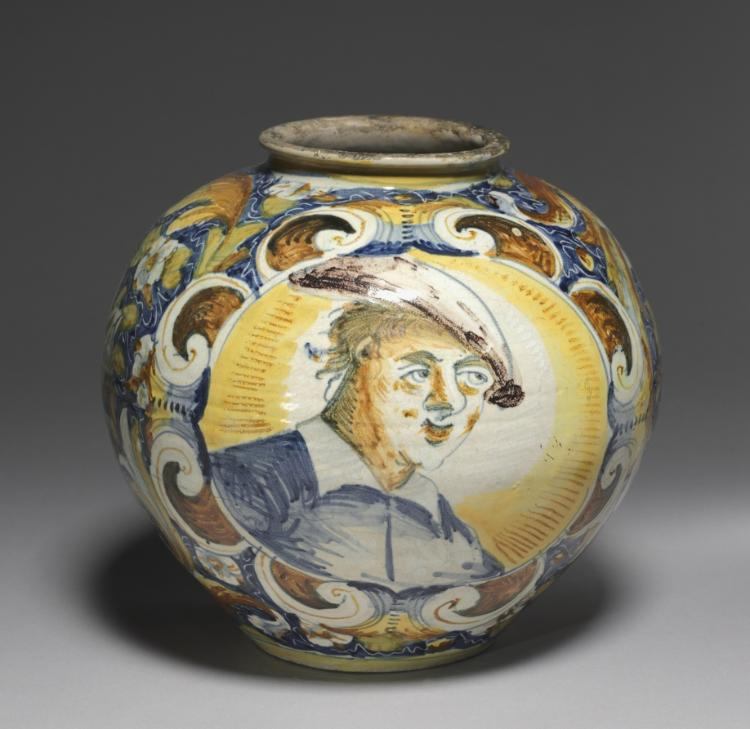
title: Storage Jar (Vaso a Palla)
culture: Italy, Venice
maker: circle of Domenego da Venezia (Italian)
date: c. 1560–80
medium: tin-glazed earthenware (maiolica)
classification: Ceramic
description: During the Italian Renaissance of the 1400s and 1500s, nobles and merchants eager to express their wealth and sophistication ordered ceramics for dining, display, and storage. Known as maiolica, because it resembled the brightly colored ceramics from the Mediterranean island of Majorca, these ceramic vessels were covered with a tin glaze that provided an opaque white surface on which colorful decoration could be painted.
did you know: In contrast to a pharmacy jar, this Vaso a Palla (globular or round-shaped jar), likely served a more domestic function and may have held oil or preserved fruits and nuts.